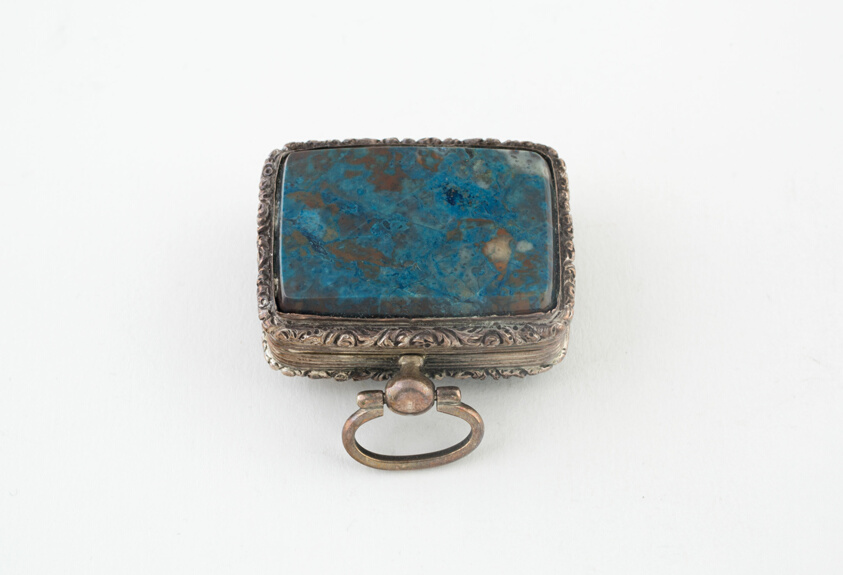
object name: Metalwork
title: Vinaigrette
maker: Possibly Birmingham, England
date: c. 1830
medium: Silver, silver gilt, and hardstone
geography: Birmingham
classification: vinaigrette (container for health care); container for personal use; box; european decorative arts; metalwork; silver; decorative object/ornament